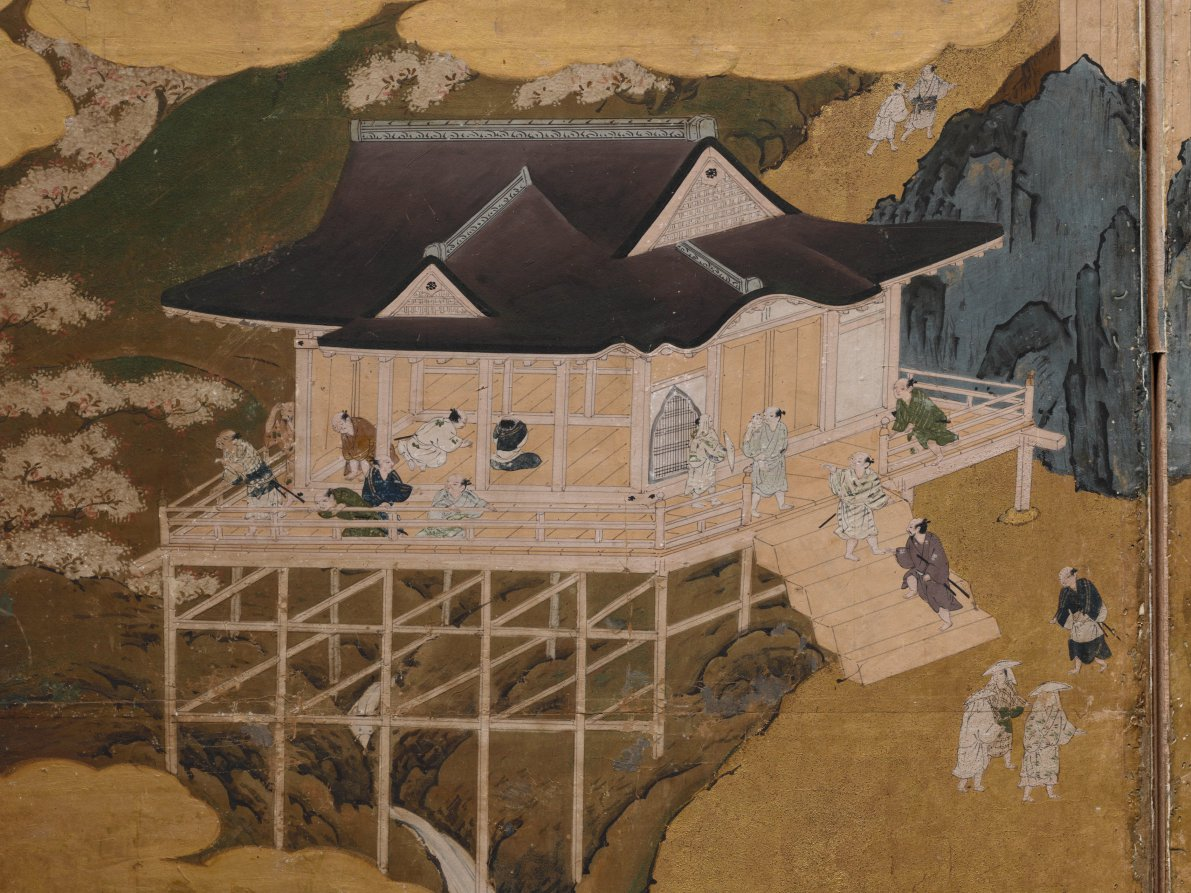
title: Famous Views of Ōmi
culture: Japan, Edo period (1615–1868)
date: 1660s–90s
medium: One of a pair of six-panel folding screens; ink, color, and gold on gilded paper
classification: Painting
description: Ōmi is an area around Lake Biwa near Kyoto. The Shinto shrine Hiyoshi Taisha and the Buddhist temple Ishiyamadera are in the upper right and upper left of the composition, respectively. At center is the pilgrimage route and people in the town before the temple gates. Harvested rice fields to the right and flowering cherry blossom trees at left show seasonal change from winter to spring.